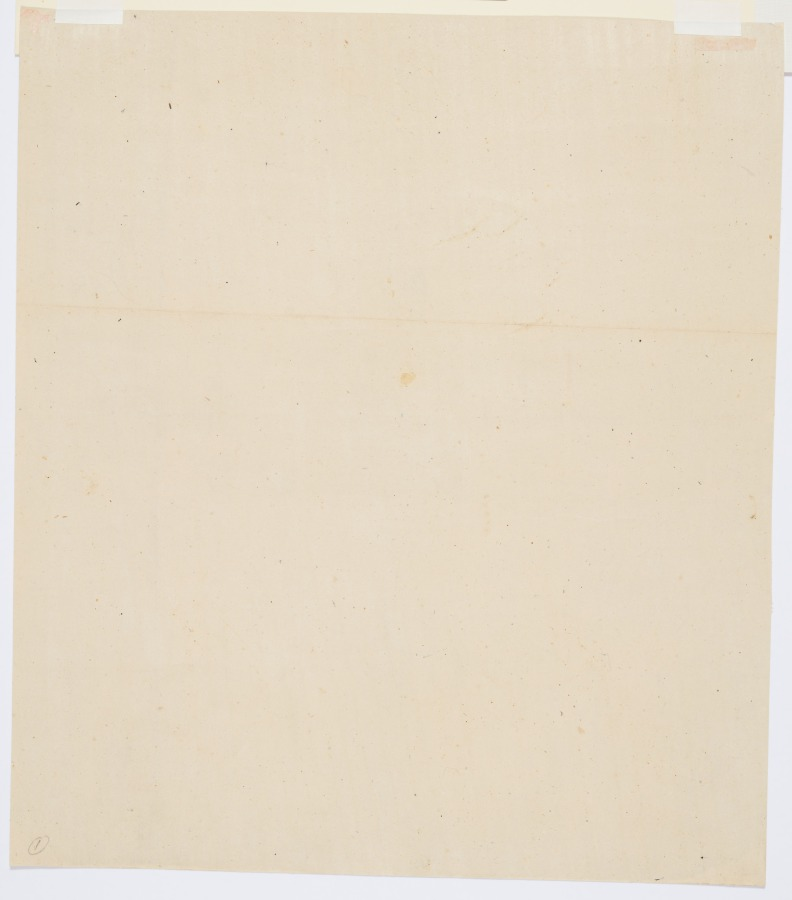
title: Caparisoned Elephant and Horses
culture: Northern India, Pahari kingdoms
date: c. 1750–55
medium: ink on paper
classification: Drawing